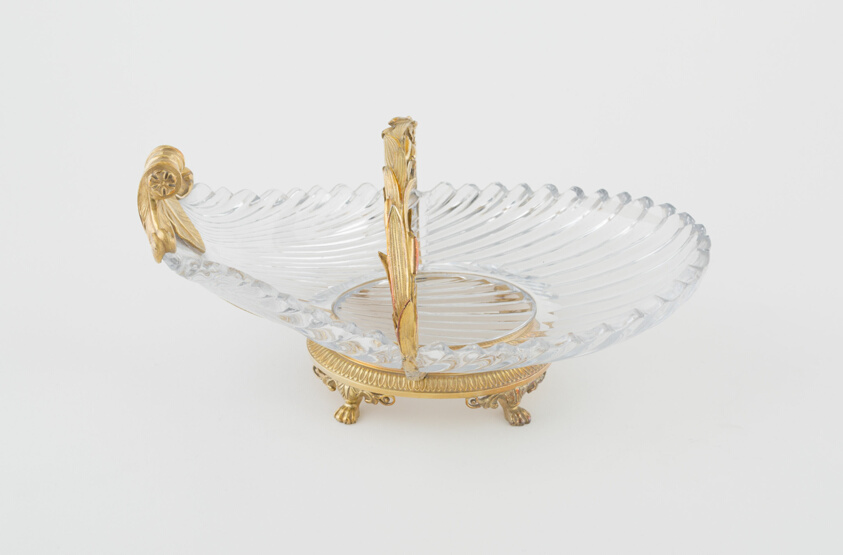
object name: Metalwork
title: Pair of Bonbon Dishes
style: Neoclassicism, rococo revival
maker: Paris, France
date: c. 1819-38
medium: Silver gilt and glass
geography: Paris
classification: dish (vessel); silver; metalwork; european decorative arts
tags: sugar, Borghese Service, dining